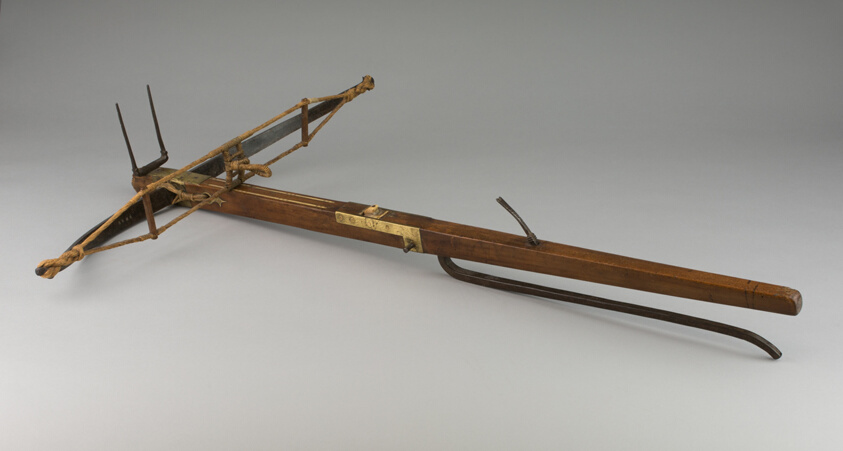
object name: Arms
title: Pellet Crossbow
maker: Spanish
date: c. 1600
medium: Maple, steel, iron, horn, and cord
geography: Europe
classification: crossbow; arms; arms and armor